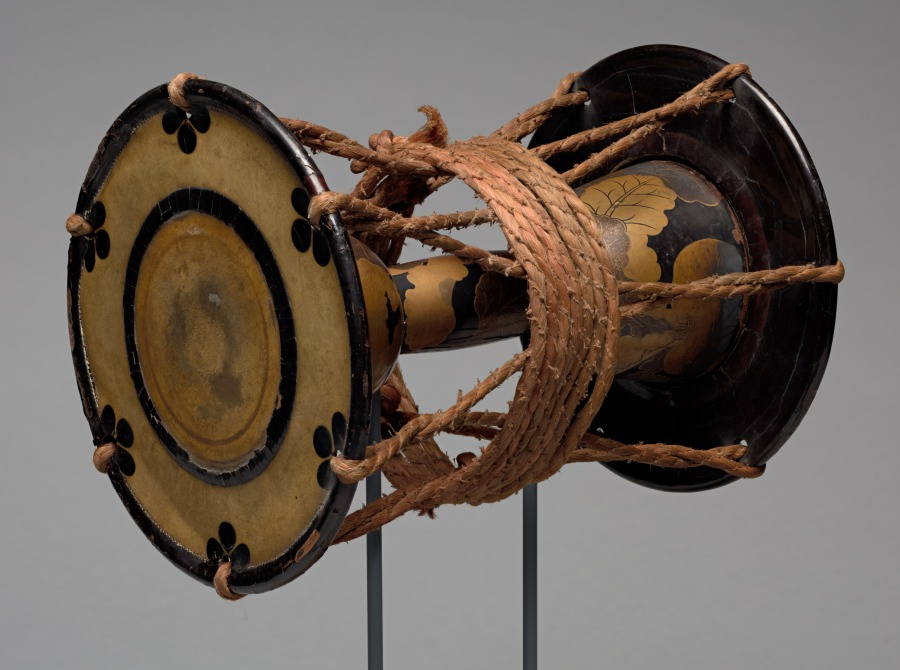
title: Tsuzumi Drum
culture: Japan, Edo period (1615–1868) to Meiji period (1868–1912)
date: 1800s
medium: Wood with lacquer and sprinkled gold powder (maki-e), hide, iron, and cord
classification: Musical Instrument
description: Tsuzumi hand drums were used as musical accompaniment for formal theatrical productions such as Noh, but also in traditional folk music. Small tsuzumi like this one are set against one shoulder, and held in place with one hand, while the other hand beats the heads. The sound is adjusted by regulating the humidity of the hide with one’s breath or spittle.